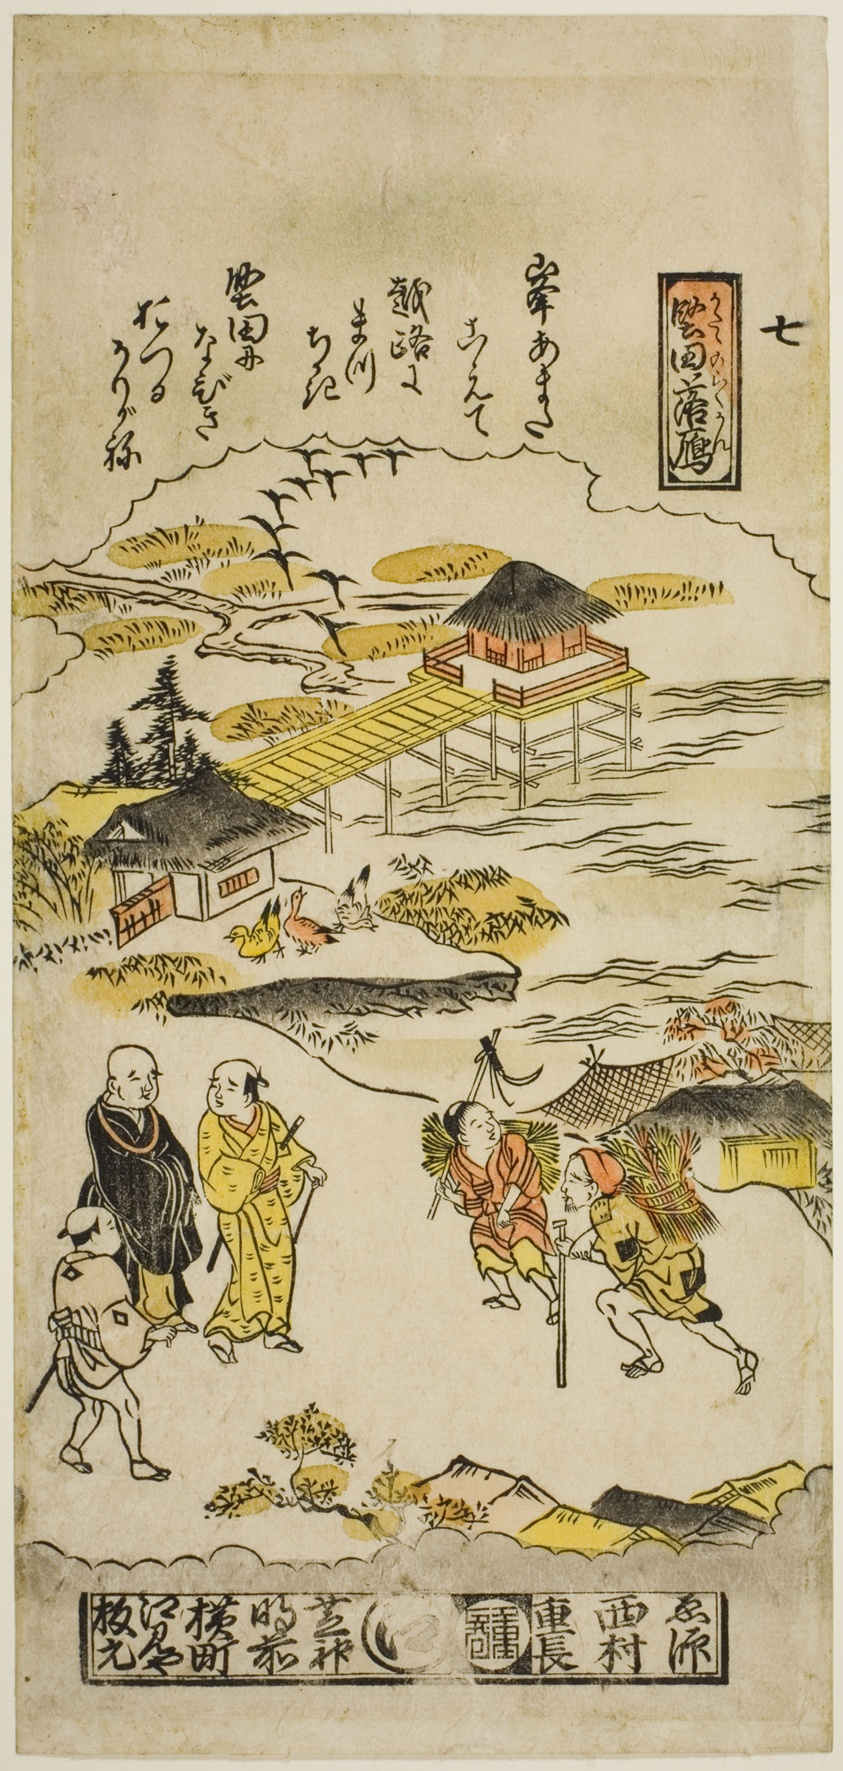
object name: Print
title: Descending Geese at Katada (Katada no rakugan), No. 7 from the series "Eight Views of Omi"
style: Japanese (culture or style)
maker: Nishimura Shigenaga (Japanese, 1697 (?)-1756)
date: c. 1716/36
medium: Hand-colored woodblock print; hosoban, urushi-e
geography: Japan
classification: woodblock print; print; asian art